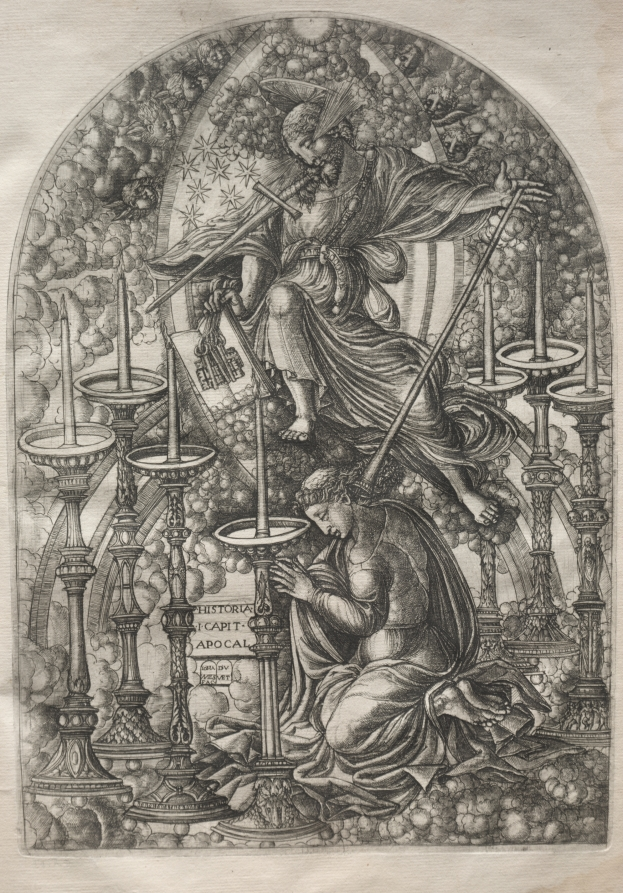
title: The Apocalypse: St. John Sees Seven Golden Candlesticks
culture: France, 16th century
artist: Jean Duvet (French, 1485–1561)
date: 1546–1556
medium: engraving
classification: Print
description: This print is part of a bound volume of works illustrating the a narrative of the Apocalypse, taken from the Revelation of Saint John in the Bible. The 23 engravings in the series occupied the artist for a number of years and represent his greatest artistic achievement. The museum's volume is one of only seven known complete sets. Jean Duvet was one of the first major printmakers in France and one of the most original artists of the 1500s. Although he worked mostly in the provincial city of Langres, he became aware of Italian art through the circulation of prints—notably those of Marcantonio Raimondi. His solidly modeled human figures reflect the influence of the Italian High Renaissance. Duvet, however, developed an idiosyncratic, highly artificial style with crowded compositions that ignore rational space in favor of ornamental surface patterns.